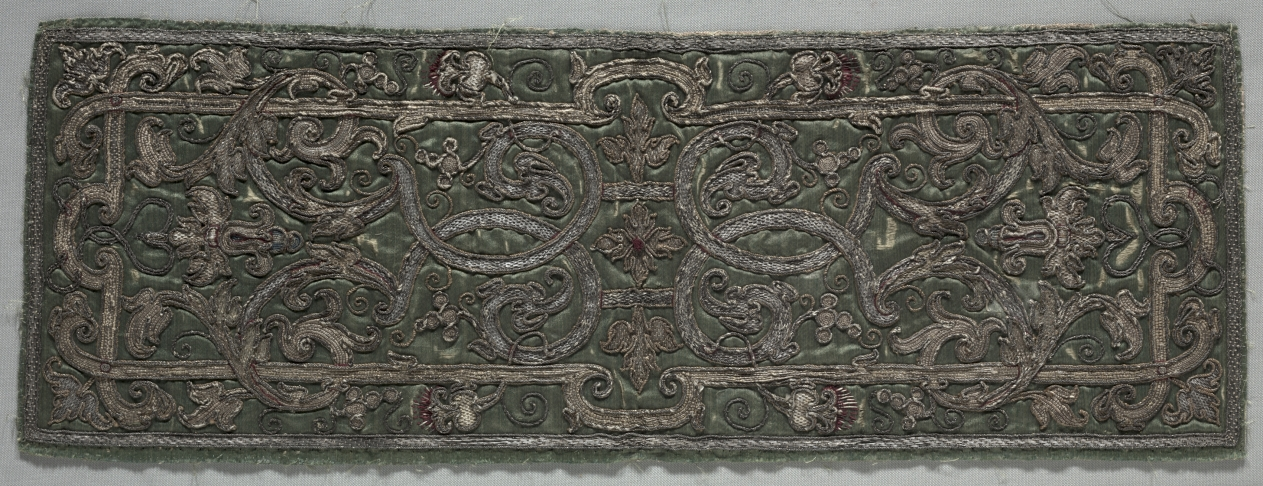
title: Apparel from a Dalmatic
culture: Italy, early 16th century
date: early 1500s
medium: embroidery; silk and metallic threads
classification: Embroidery